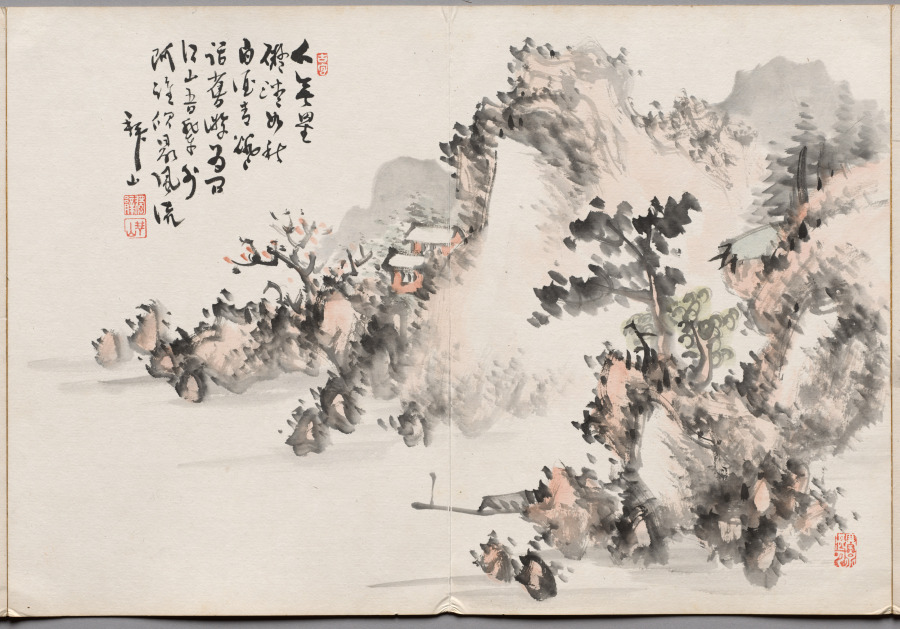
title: Painting Eight from Album of Paintings by Haizan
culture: Japan, Meiji period (1868–1912) or Taishō period (1912–26)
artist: Yoshitsugu Haizan (Japanese, 1846–1915)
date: late 1800s–early 1900s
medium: page spread from double-sided accordion album; ink and color on paper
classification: Painting